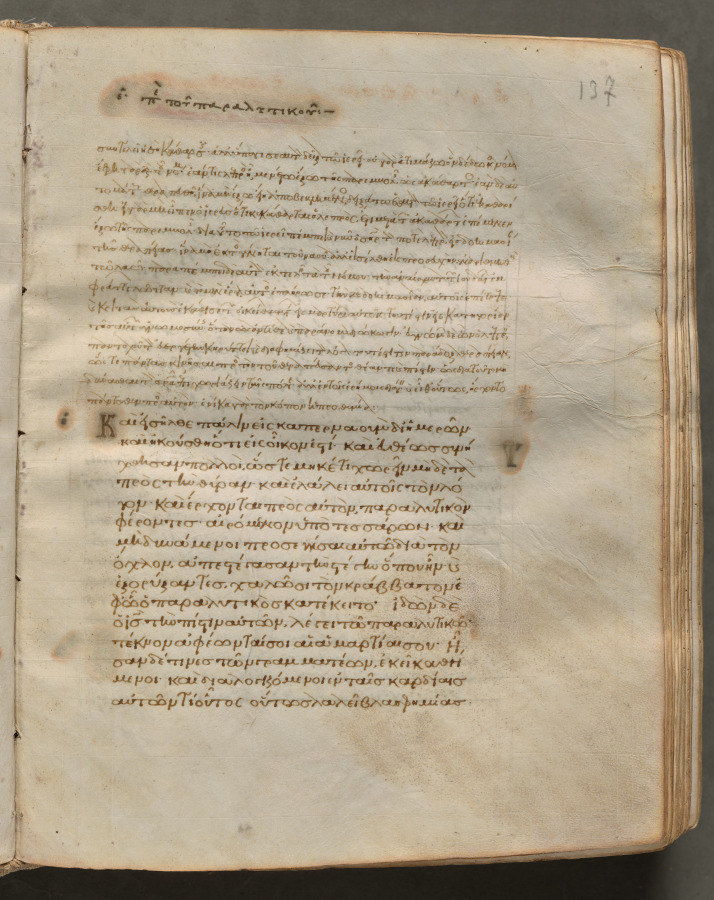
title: Text, folio 137 (recto), from a Gospel Book with Commentaries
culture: Byzantium, Constantinople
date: c. 1000–1100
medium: ink, tempera, and gold on vellum; leather binding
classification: Bound Volume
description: Each of the four gospels in this book opens on a page with brilliantly illuminated borders depicting the author of the text as well as birds-principally peacocks, symbols of the immortality of the soul-and fountains, representing the fountain of life and the salvation of the soul. This volume consists of 428 leaves with texts in Greek. Its level of sophistication suggests that it was probably written and decorated in a monastery in Constantinople.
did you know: Gospel Books were carried in procession through Byzantine churches.